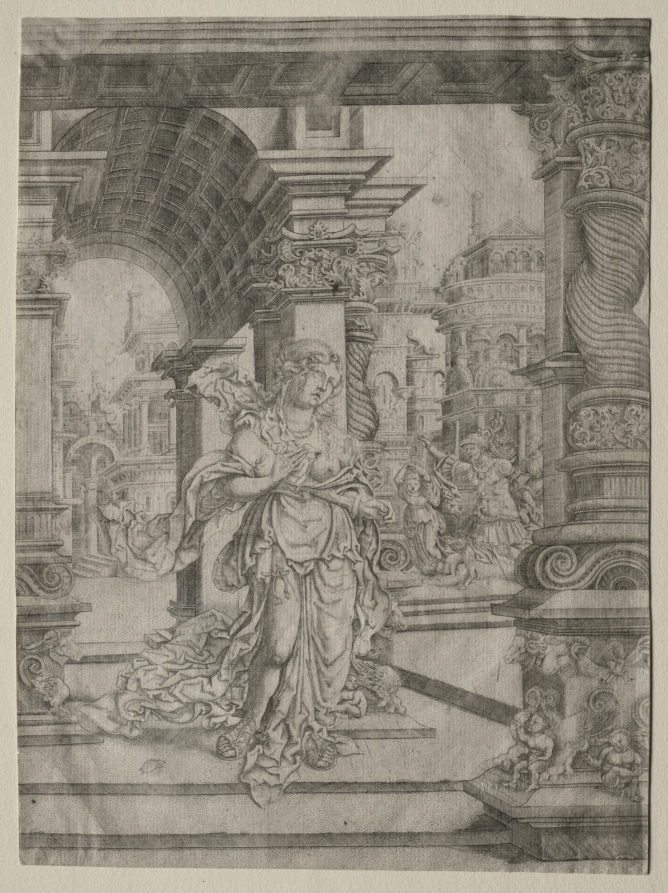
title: Death of Lucretia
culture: Flanders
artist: Frans Crabbe van Esplegem (Flemish, c. 1480–1552)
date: 1520–30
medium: engraving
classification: Print